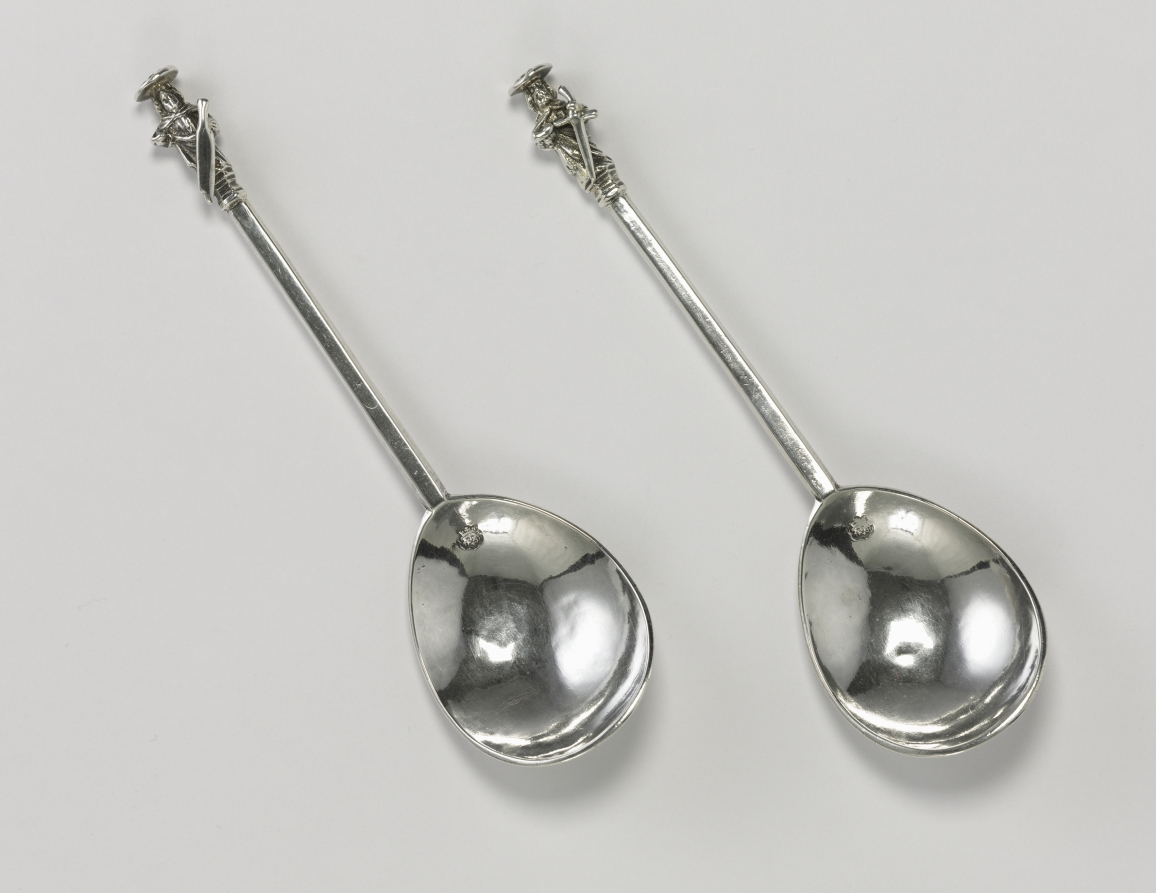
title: Saint Paul Spoon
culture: England, London, 17th century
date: 1622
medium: silver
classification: Silver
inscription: pricked on back of bowl: "R H."